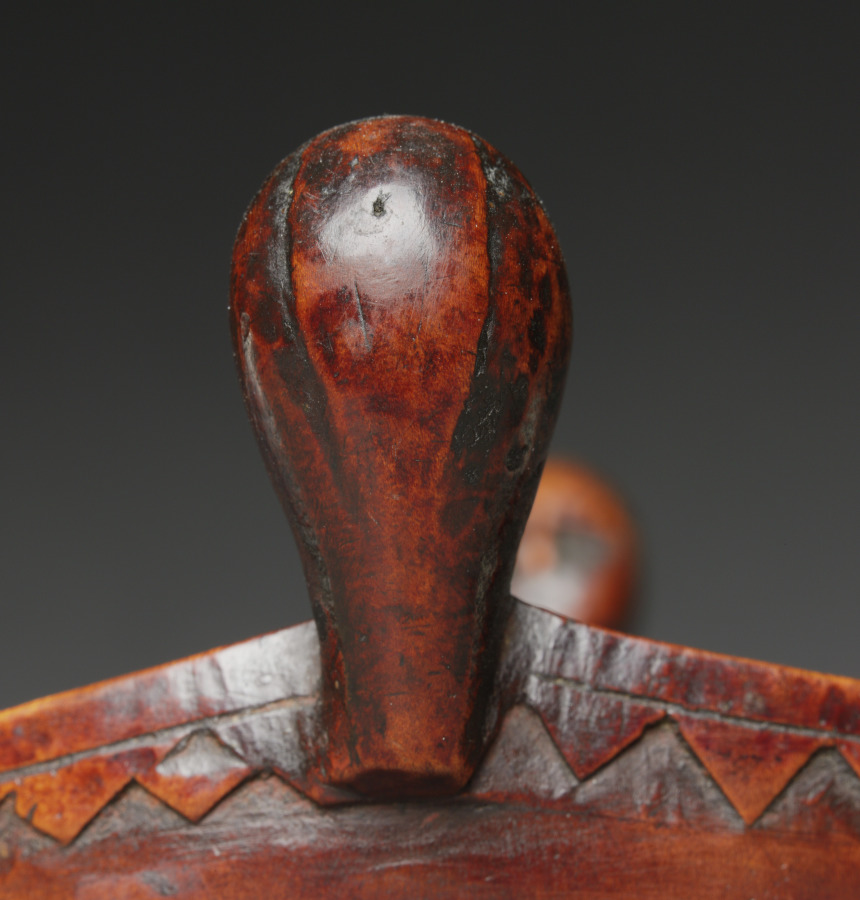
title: Bowl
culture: Native North America, Northeastern Woodlands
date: early 1800s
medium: wood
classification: Wood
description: Fine wooden bowls were often used during feasts in the Northeastern Woodlands. The heads on the rims may represent spirit beings, perhaps the owner’s guardian spirits, acquired through dreams or visions—thought to be the ultimate sources of truth. The medium may also be profoundly meaningful. A Great Lakes (Meskwaki) Native said in 1911, “The murmur of the trees when the wind passes through is but the voices of our grandparents. Often a whole forest hums with talk . . . we often hear the sound of their laughter and the sound of their lamentations.”